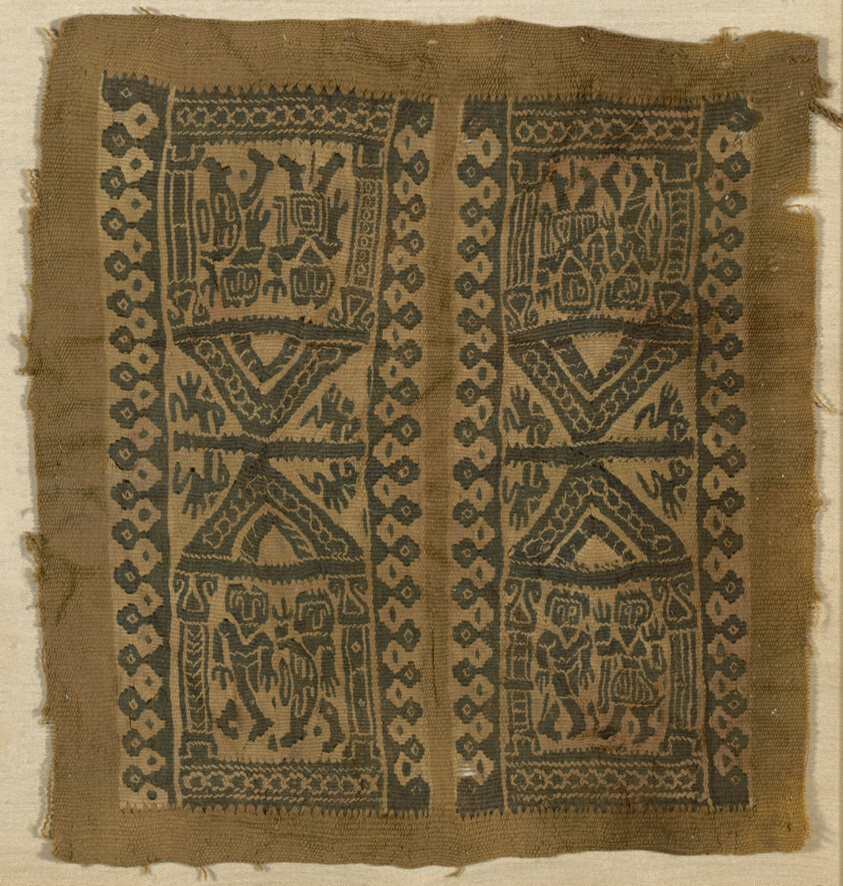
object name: Textile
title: Square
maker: Coptic (Egypt)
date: Arab period (641–969)/Fatimid period (969–1171), 9th/10th century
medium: Linen and wool, slit tapestry weave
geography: Egypt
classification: textile; weaving